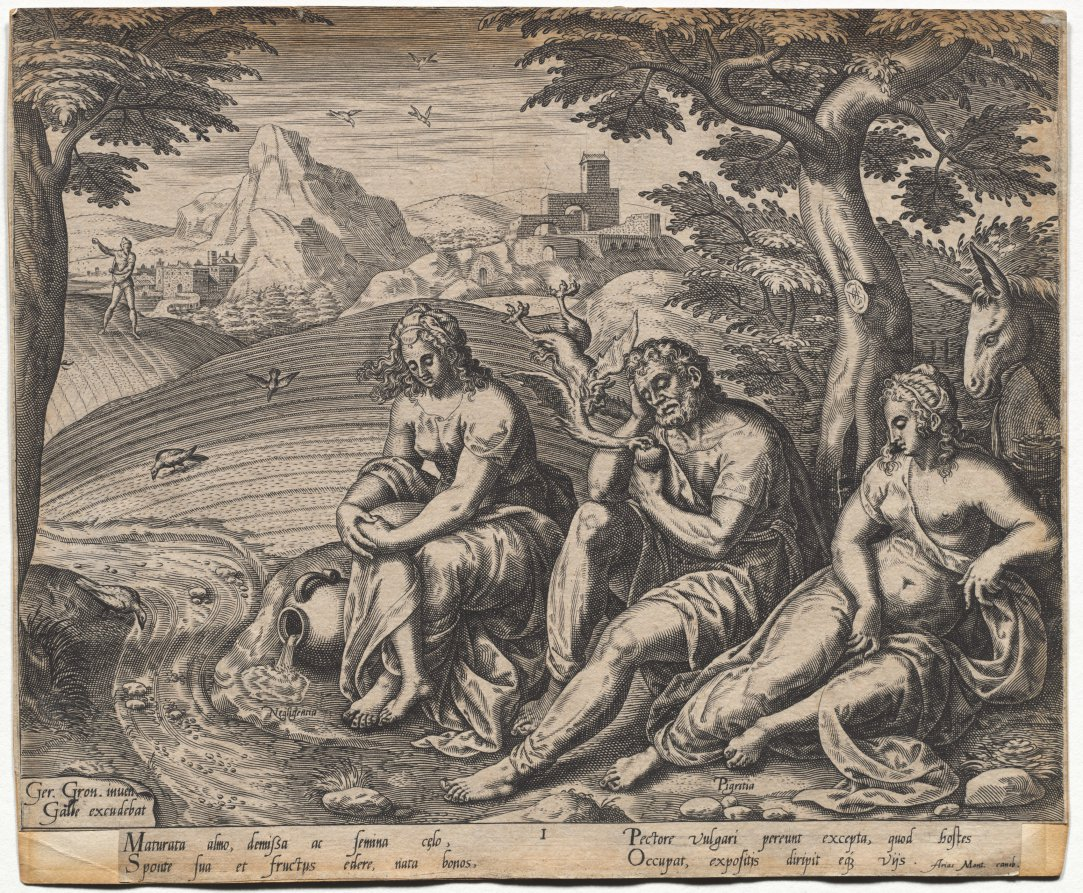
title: The Parable of the Sower and the Seed: The Seed Falling by the Way Side (after Gerard Van Groeningen, active Antwerp 1563-1573)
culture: Netherlands, 16th century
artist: after Gerard van Groeningen (Flemish)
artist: Philip Galle (Flemish, 1537–1612)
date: 1574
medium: engraving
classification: Print